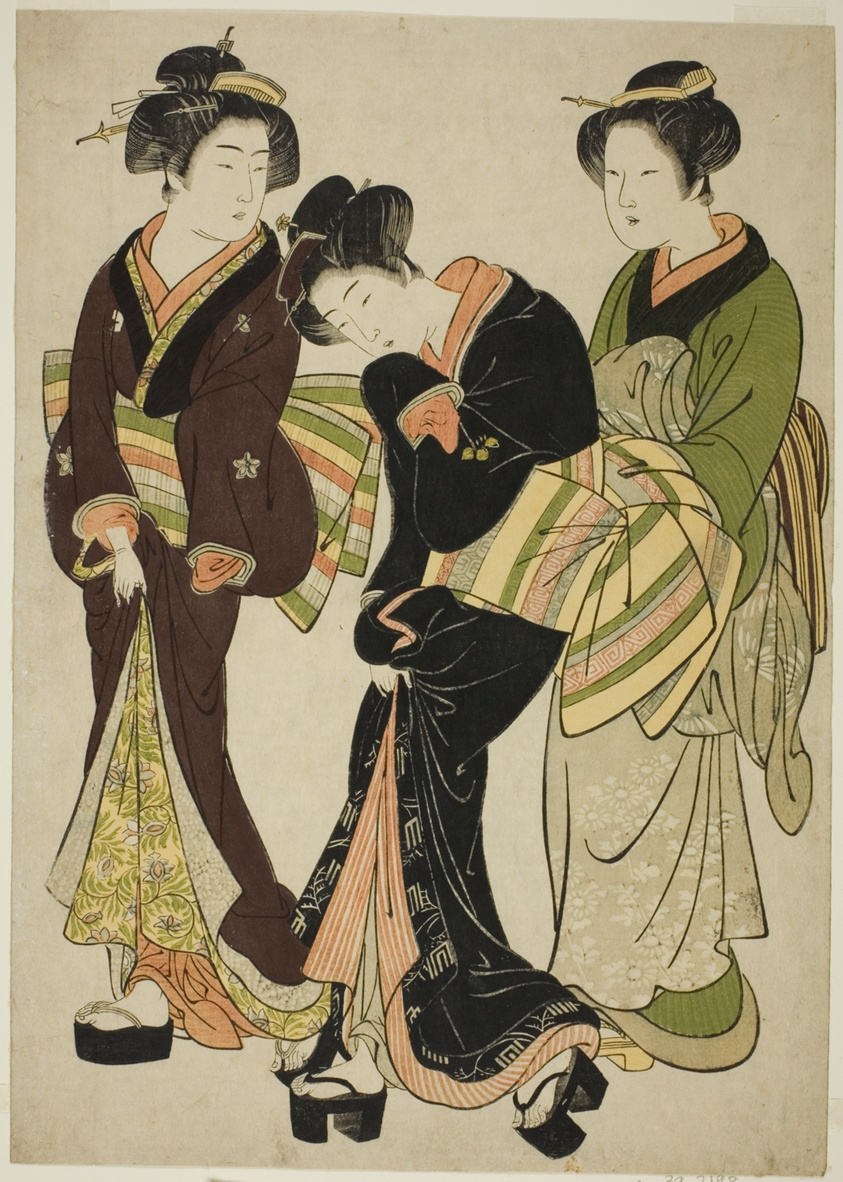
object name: Print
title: Two Entertainers and a Maid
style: Japanese (culture or style)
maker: Attributed to Kitao Shigemasa; Japanese, 1739-1820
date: c. 1777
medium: Color woodblock print; oban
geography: Japan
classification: woodblock print; print; asian art